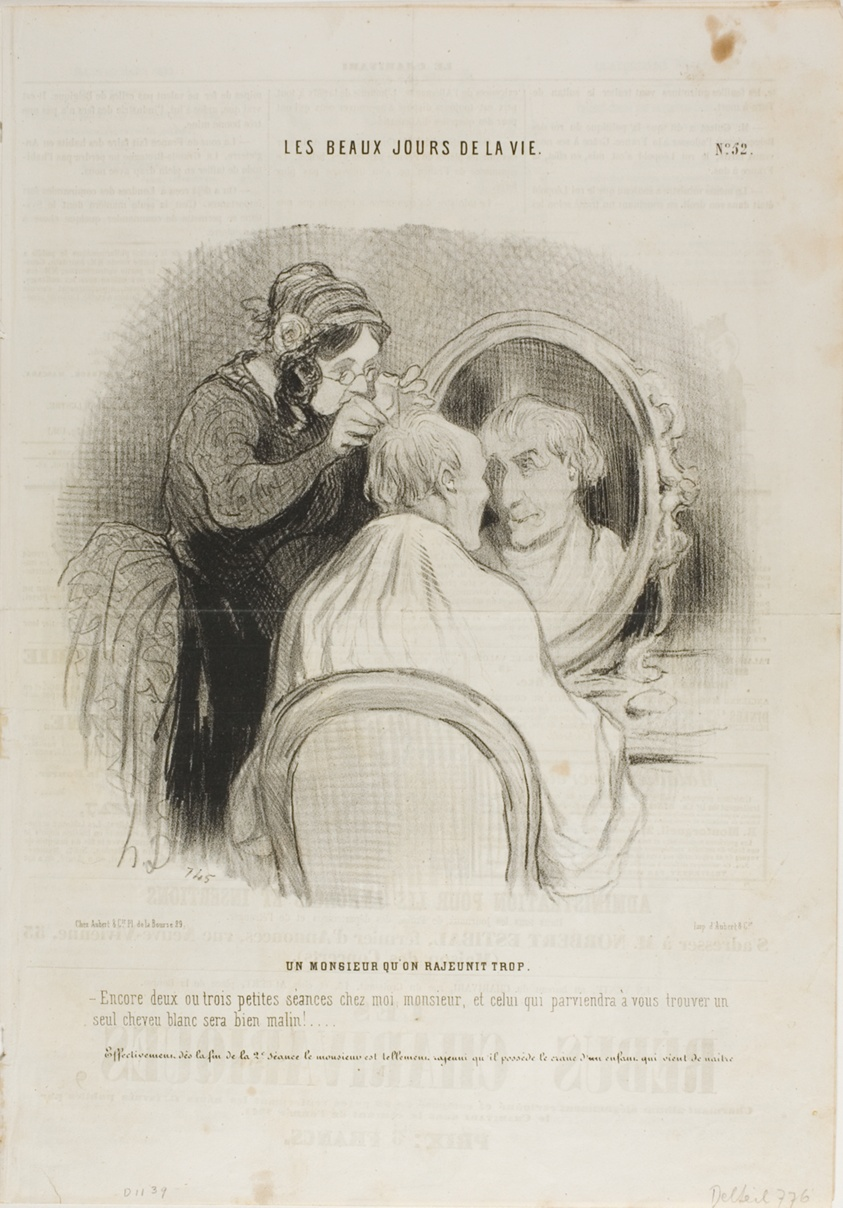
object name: Print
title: An Exaggerated Rejuvenation. “Just two or three sessions with me, Monsieur, and anyone who still claims to find a grey hair on you, is a malicious person.” As a matter of fact, since the end of the second session, Monsieur's head looks as shiny as that of a newborn baby, plate 52 from Les Beaux Jours De La Vie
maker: Honoré Victorin Daumier; French, 1808-1879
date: published March 27, 1845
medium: Lithograph in black, with scraping on stone on cream wove paper (sheet folded to form four pages), with text added in another hand and letterpress verso (and recto when unfolded)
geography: France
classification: lithograph; print; prints and drawing